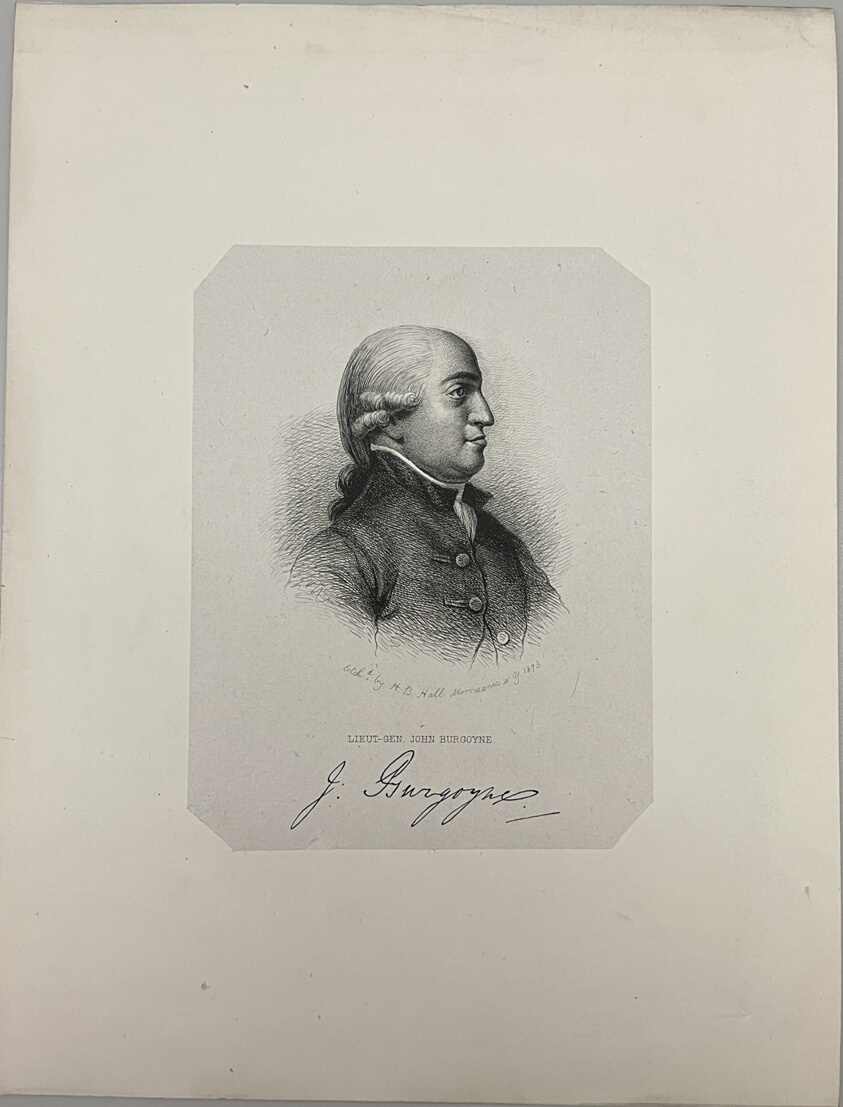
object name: Print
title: Lieutenant General John Burgoyne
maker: Henry Bryan Hall (American, 1808-1884)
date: 1873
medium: Etching on paper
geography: United States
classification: reproduction; print; prints and drawing